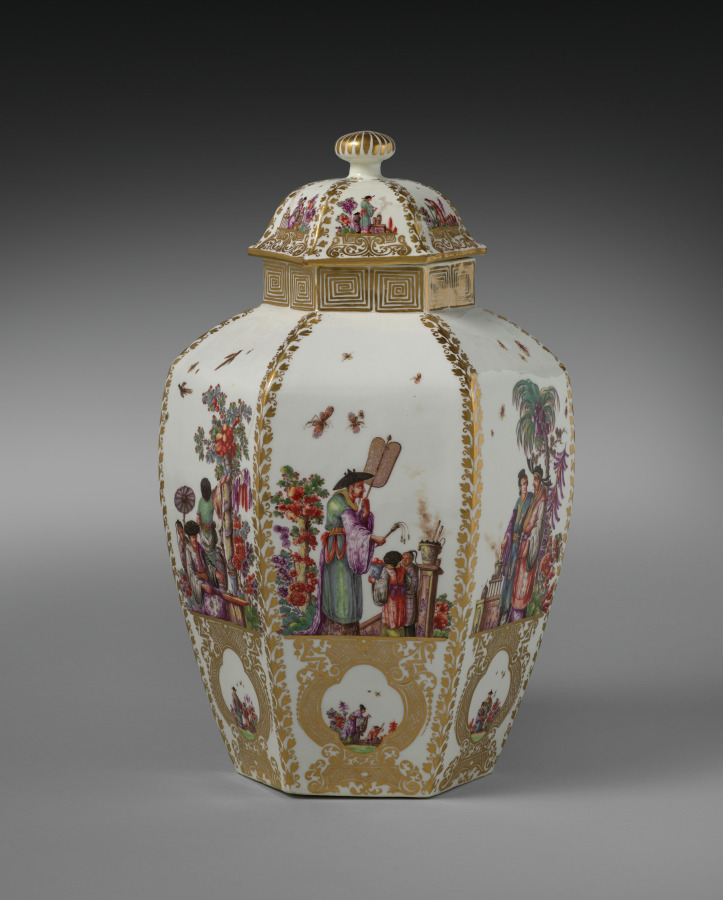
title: Covered Vase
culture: Germany, Meissen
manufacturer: Meissen Porcelain Factory (German, est. c. 1710)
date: c. 1728–30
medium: porcelain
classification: Ceramic